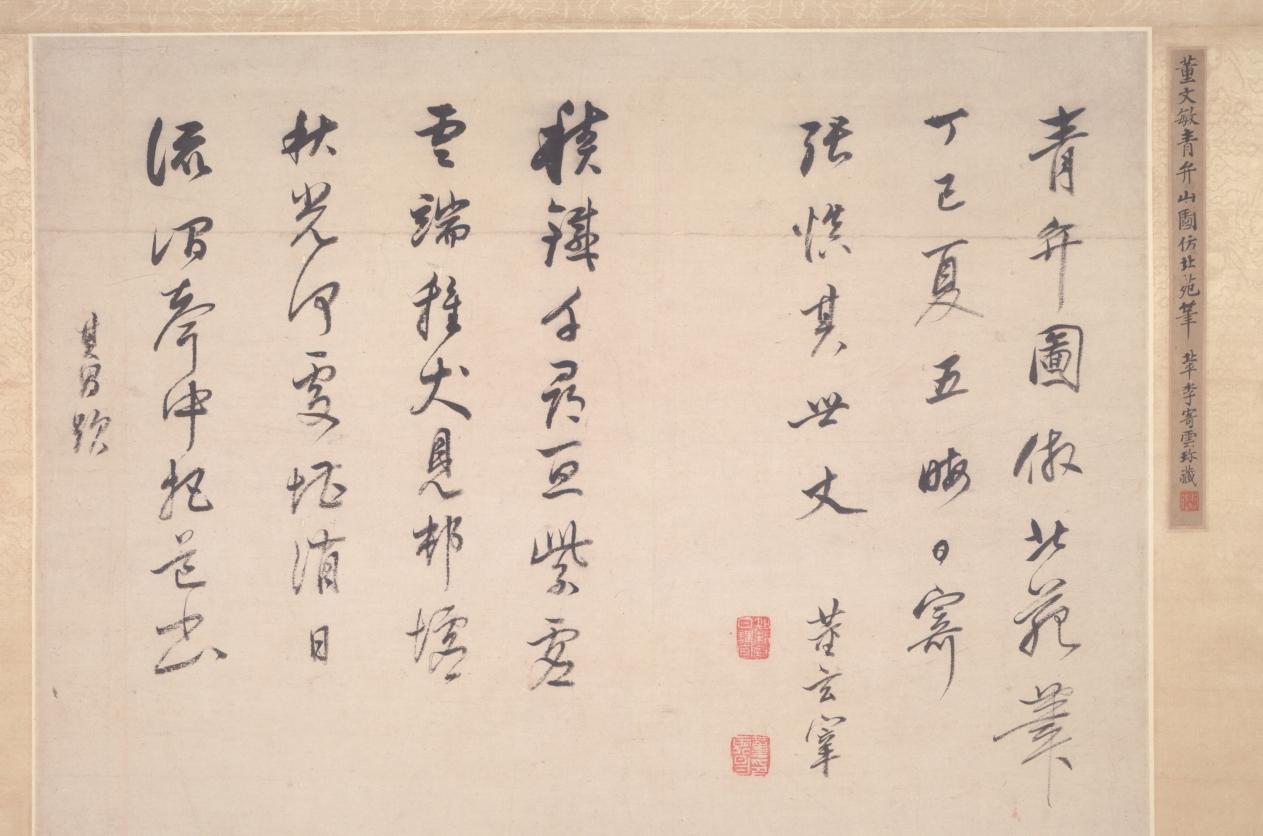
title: Mt. Qingbian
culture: China, Ming dynasty (1368–1644)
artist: Dong Qichang (Chinese, 1555–1636)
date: 1617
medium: hanging scroll, ink on paper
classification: Painting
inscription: Artist's first inscription, signature, and 2 seals: A painting of the Qingbian Mountains in the manner of Beiyuan [Dong Yuan]. In the summer of the dingsi year [1617], on the last day of the fifth month, [I] send this to my senior, Zhang Shenqi. Dong Xuanzai [seals] Zhi zhi hao ri jiang guan 知制誥日講官; Dong Qichang yin 董其昌印.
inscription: Artist's second inscription and signature: Piling irons for ten thousand feet guard the purple sky;/ Where puppies are seen on top of clouds, villages and marketplaces lie./ In the splendor of autumn, where is the most worthy spot to spend the day?/ Amid the rustling sounds of mountain streams, with a volume in hand, meditating on the Way [Dao]. Inscribed by Qichang. (trans. WKH/LYSL)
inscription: 4 additional seals: 3 of Li Enqing 李恩慶 (jinshi of 1833); 1 of Weng Wan-go 翁萬戈 (b. 1918).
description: Dong Qichang radically transforms the landscape composition into a purely abstract design. He organizes the mountain forms to achieve an overall sense of structure, activating the flow of energy (qi) and the momentum of force (shi) throughout the pictorial design. In his art, brush and ink assume life independent of the depicted forms, so that the painting can be appreciated for “the sheer marvels of brush and ink.”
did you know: Dong Qichang had visited the Bian Mountains, which are part of a low range located not far from Wuxing and Lake Tai in the southern province of Zhejiang.